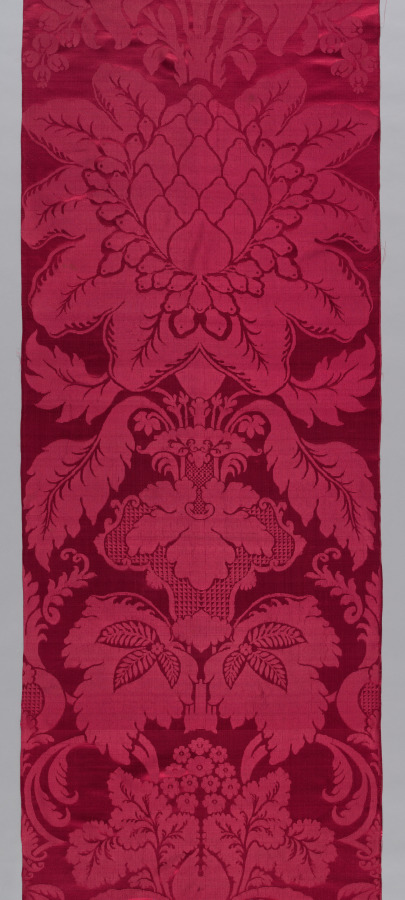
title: Two Large Damask Cloths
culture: Italy, 17th century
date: 1600s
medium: damask, silk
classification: Textile